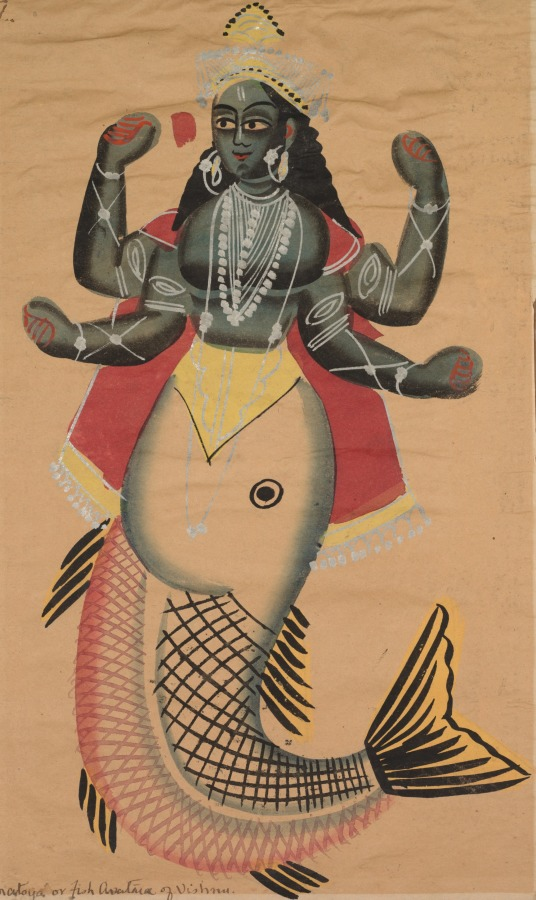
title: Matsya, Fish Avatara of Vishnu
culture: Eastern India, Bengal, Kolkata, Kalighat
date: c. 1890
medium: Gum tempera, graphite, ink, and tin on paper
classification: Painting